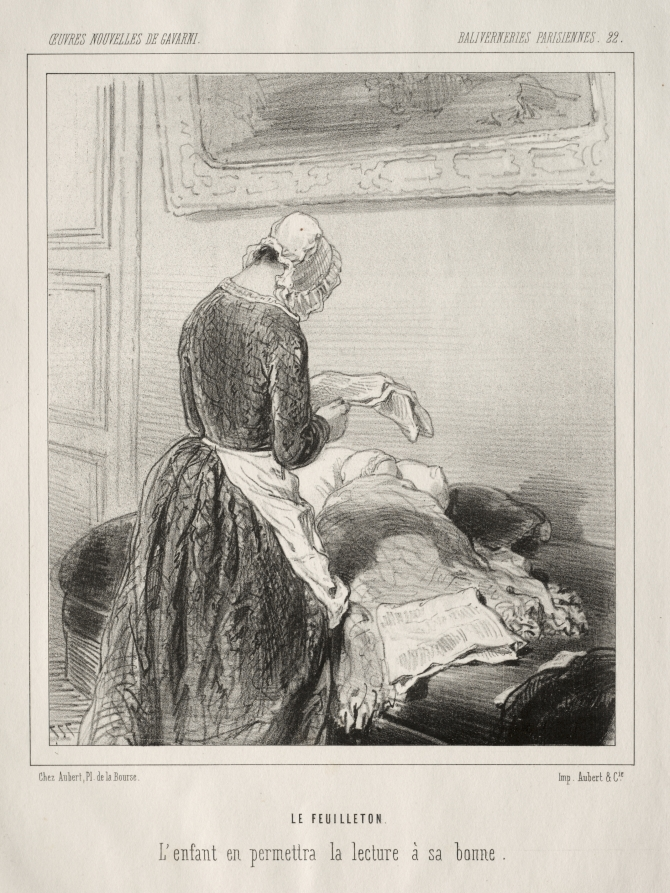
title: Baliverneries Parisiennes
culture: France, 19th century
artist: Paul Gavarni (French, 1804–1866)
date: c. 1847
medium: lithograph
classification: Print